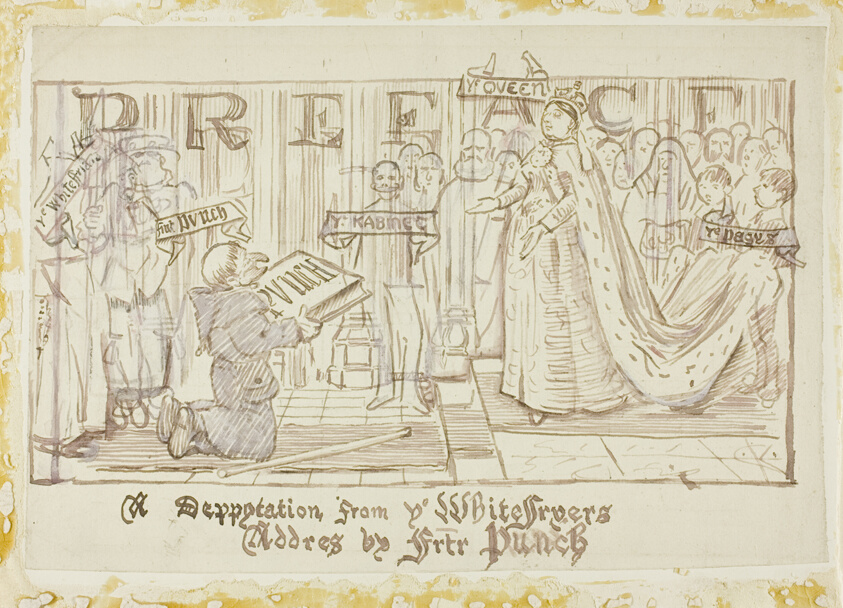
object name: Drawing and Watercolor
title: A Deputation from the Whitefriars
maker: Charles Samuel Keene (British, 1823-1891)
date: 1870/91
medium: Pen and brown ink, with brush and white gouache, over traces of graphite, faintly squared in graphite, on ivory wove paper, laid down on ivory wove card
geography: England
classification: pen and ink drawings; drawings (visual works); prints and drawing